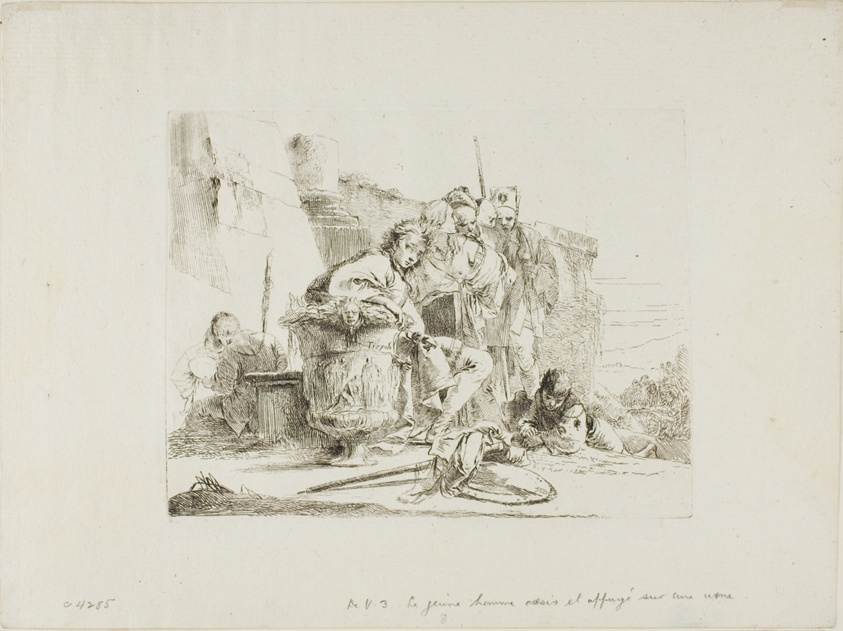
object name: Print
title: Seated Youth Leaning Against an Urn, from Capricci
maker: Giovanni Battista Tiepolo (Italian, 1696–1770)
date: 1740/50, published 1785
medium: Etching on paper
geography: Italy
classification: etching; print; prints and drawing